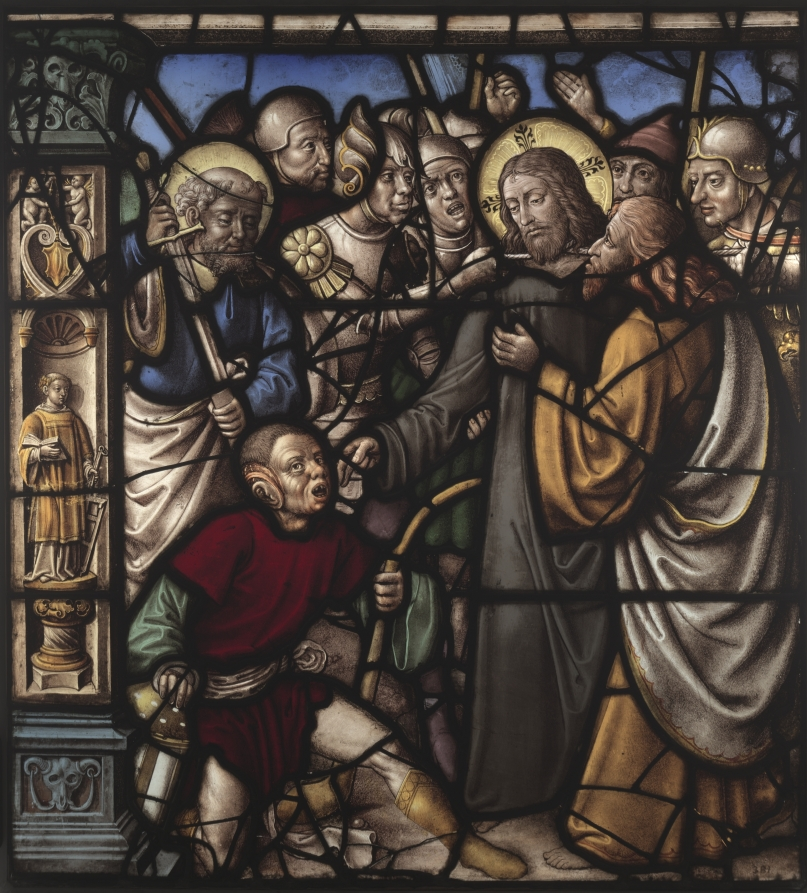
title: The Kiss of Judas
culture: Germany, Cologne, 16th century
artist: Everhard Rensig (German)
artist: or Gerhard Remisch (German)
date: 1522–1526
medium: pot-metal and white glass, silver stain and sanguine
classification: Glass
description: These two stained glass panels originally belonged to an extensive program of Old and New Testament subjects that originally decorated the cloister of the Cistercian Abbey of Mariawald, near Cologne. The original placement of glass at Mariawald involved windows composed of two openings. Each comprised three large glass panels plus a smaller tracery panel. Two scenes in each window represented Old Testament subjects (below) and the New Testament (above). Above the biblical narrative panels were smaller messenger panels depicting images of prophets with scrolls. At the base of each window were donor and patron saint panels. In this way, the Old Testament was shown to prefigure the events of the New. These two panels depicting scenes of Christ’s Passion were originally located in the north corner of the east cloister gallery with the Kiss of Judas on the left, and Christ in Gethsemane on the right. Mariawald was founded in 1480 and closed in 1802 when the stained glass windows were removed. Recent scholarship has attributed the glass to the Rhenish glass painters Everhard Rensig or Gerhard Remisch.